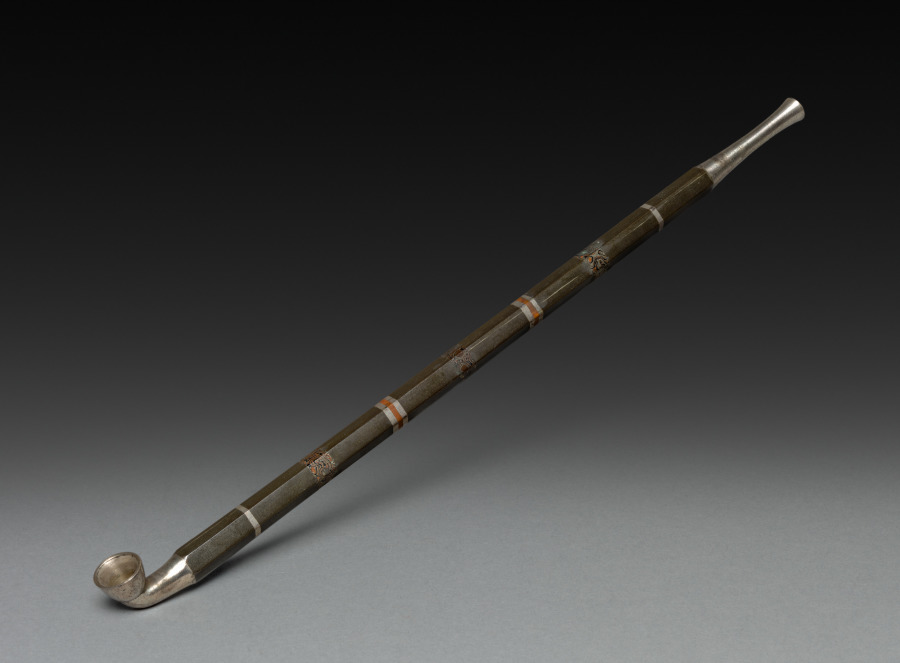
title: Tobacco Pipe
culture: Japan, Edo period (1615–1868)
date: 1700s to mid-1800s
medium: metal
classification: Miscellaneous